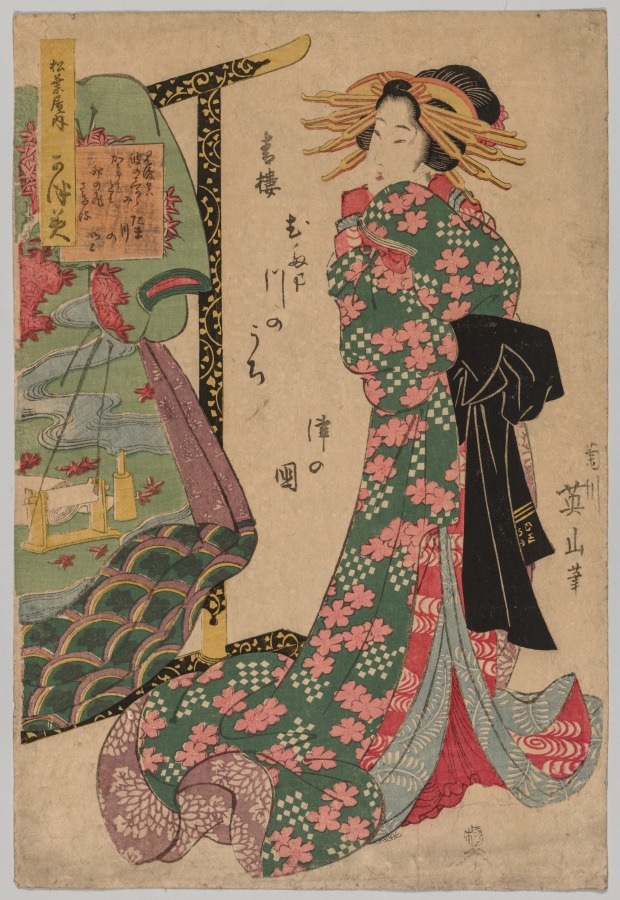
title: Courtesan Beside Kimono Rack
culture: Japan, Edo period (1615–1868)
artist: Kikukawa Eizan (Japanese, 1787–1867)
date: 1787–1867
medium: color woodblock print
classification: Print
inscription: Signature: Kikugawa Yeizan fude